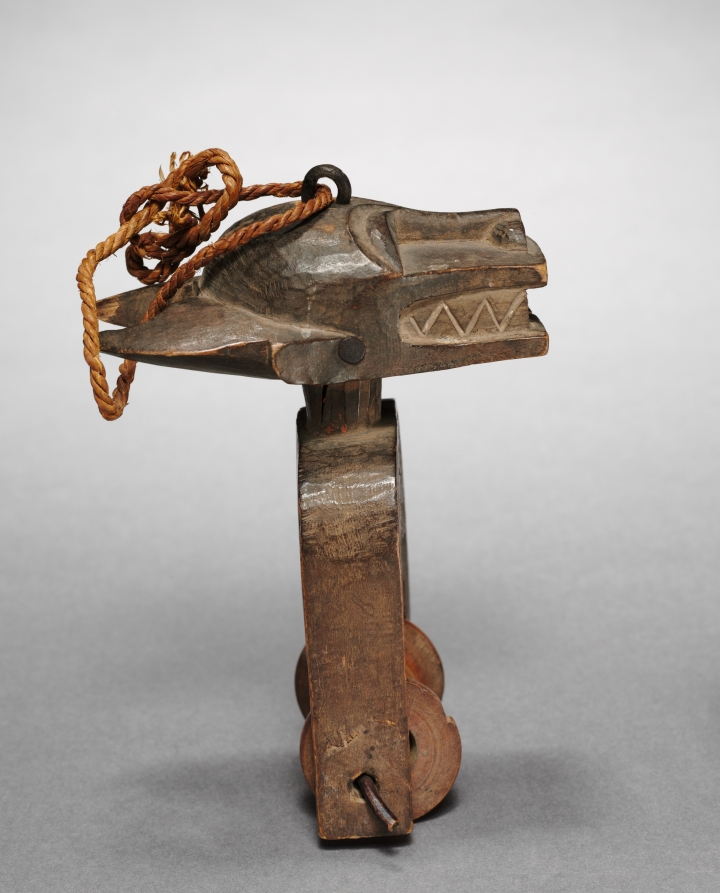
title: Heddle Pulley (Bo Nun Amuin mask)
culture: Africa, West Africa, Côte d’Ivoire, Baule-style carver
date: 1900s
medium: Wood, metal, and plant fiber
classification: Implements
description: The heddle pulley, a working element of a narrow-band loom, bears a miniature sculpture. Heddle pulleys support and separate threads during weaving. Mounted above the weaver, the pulleys allow him to glance up at an object of inspiring beauty, rather than pure functionality. This pulley depicts a face mask, a secular usage of a typically sacred mask type.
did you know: This heddle pulley depicts a fearsome Bo Nun Amuin mask that recalls nature spirits.